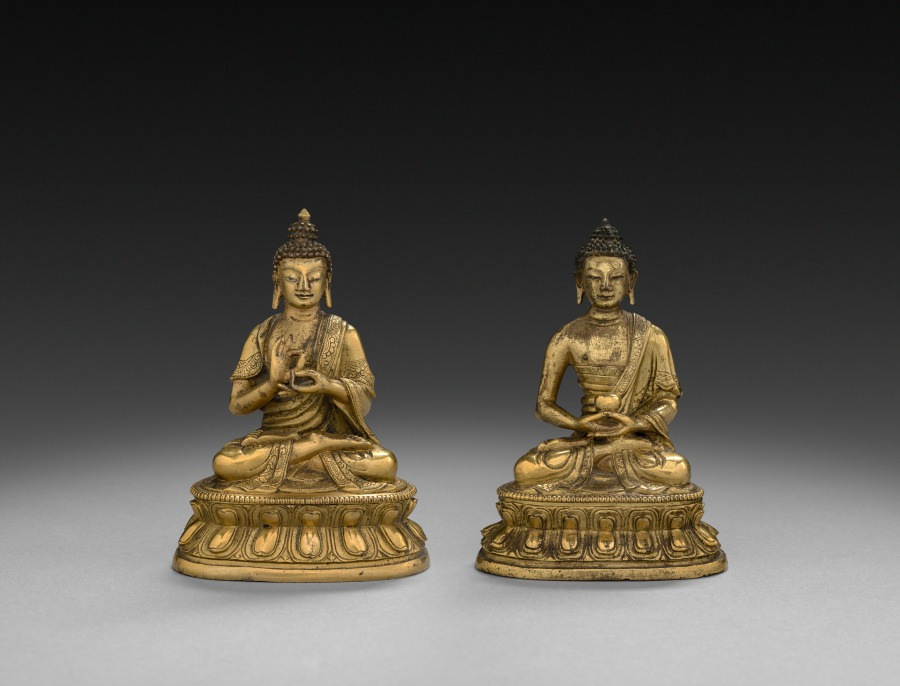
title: Pair of Seated Buddhas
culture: China, Ming dynasty (1368–1644)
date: 1500s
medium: gilt bronze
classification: Sculpture